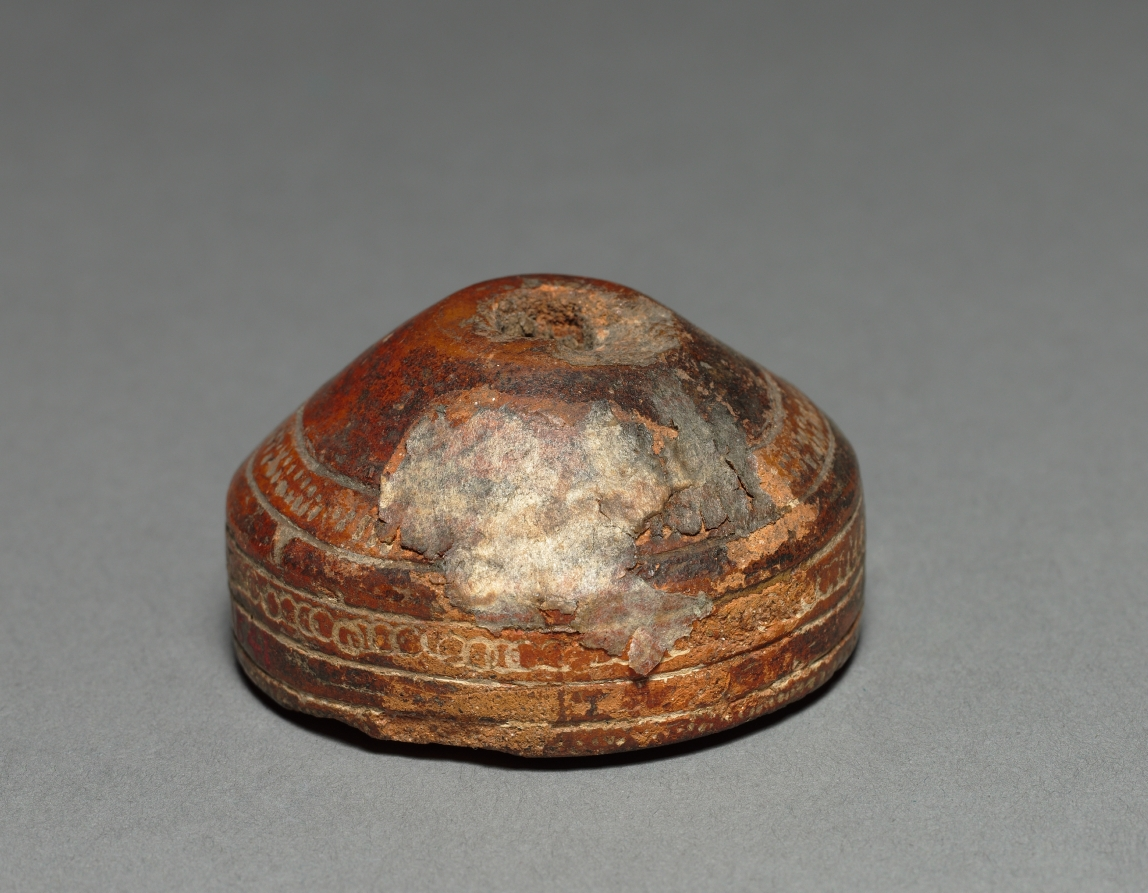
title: Spinning Whorl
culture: Colombia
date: before 1550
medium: red ware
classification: Ceramic